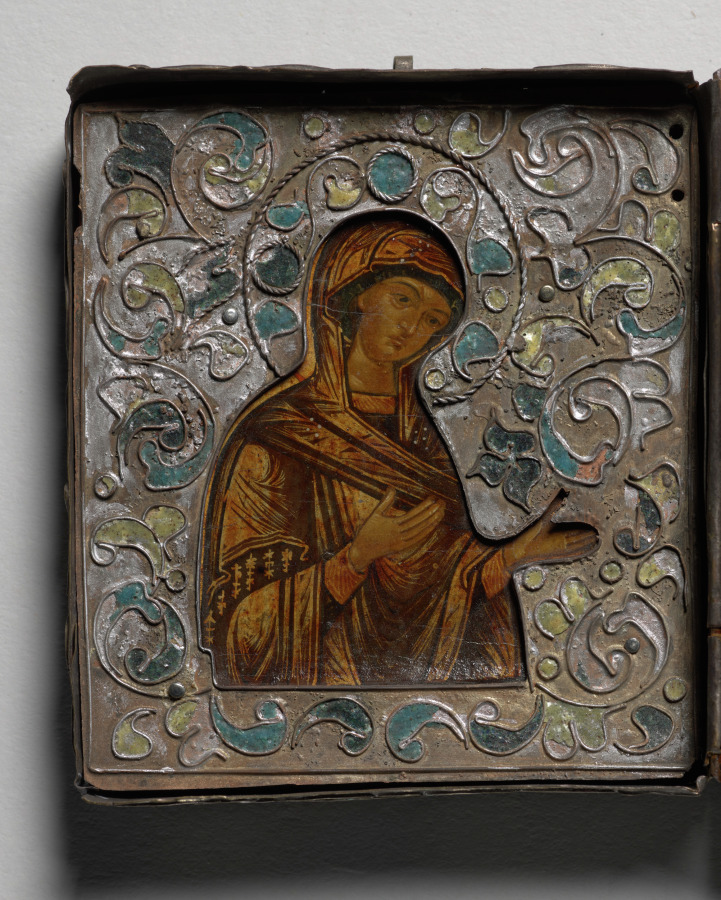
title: The Virgin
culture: Russia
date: 1800s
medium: pigment on wood, in cloisonné enamelled insert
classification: Painting